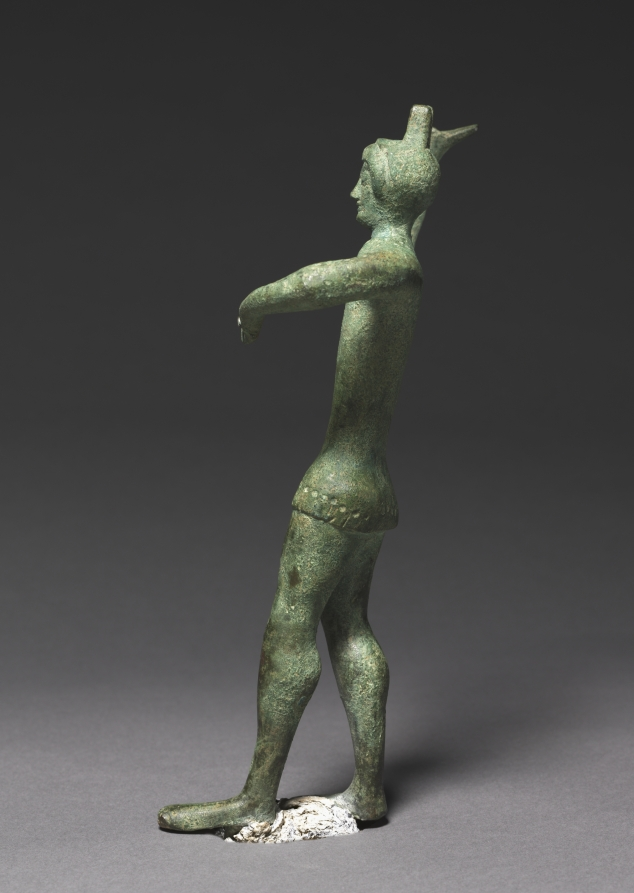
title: Statuette of a Warrior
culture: Etruscan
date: 500–450 BCE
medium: bronze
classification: Sculpture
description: Striding forward with its left foot, this warrior likely once held a shield in the left hand and a spear or sword in the right. The statuette was acquired together with a miniature bronze sword with which it was said to have been found; a photograph taken around 1890 shows the warrior with the sword attached—probably wrongly—to the left hand. He wears an unusual helmet with two raised elements on top, and a simple v-neck cuirass or tunic with a lower border of dots and flaps. Many similarly posed bronze figurines have been found across central Italy, but scholars disagree as to whether they represent divine or mortal warriors.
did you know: The lump of lead beneath its feet probably once secured this figurine to a base.